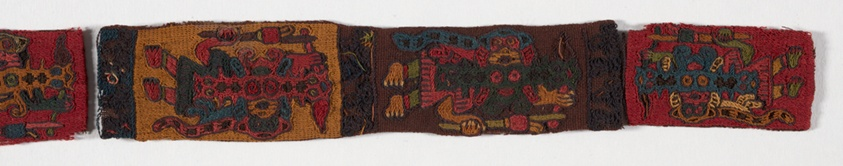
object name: Textile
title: Fragments (Border)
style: nazca, paracas, andean, andes, Pre-Columbian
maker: Nazca; Peru, south coast, Nazca Valley, Coyungo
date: 100 B.C./A.D. 200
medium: Cotton, plain weave; embroidered with camelid wool and cotton in stem and running stitches.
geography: Peru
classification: textile; needlework (visual works)